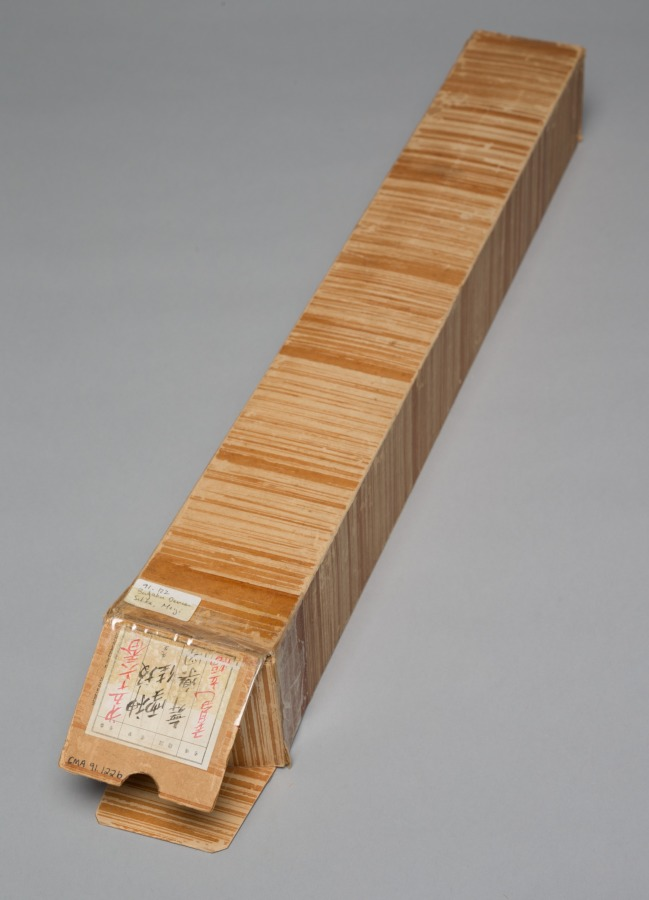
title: Bugaku Dancer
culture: Japan, Meiji period (1868–1912) to Shōwa period (1926–89)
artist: Kamisaka Sekka (Japanese, 1866–1942)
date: c. 1890–1942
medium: hanging scroll; ink and color on silk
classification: Painting